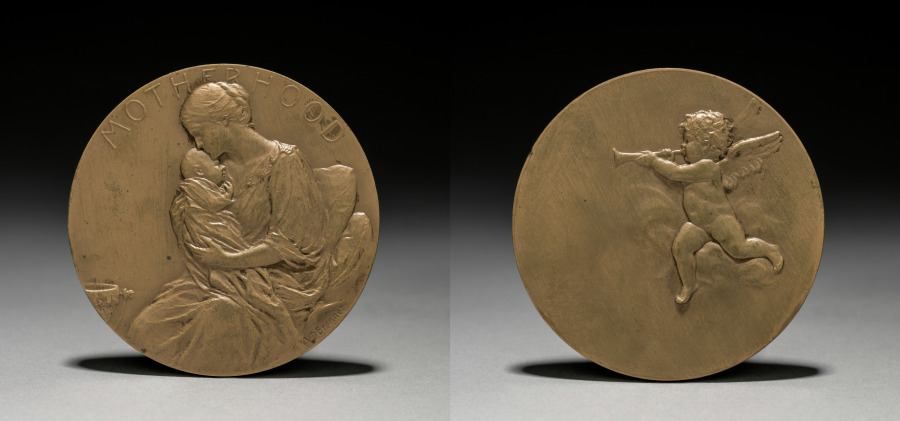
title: Medal: Motherhood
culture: America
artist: Victor D. Brenner (American, 1871–1924)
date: 1911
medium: bronze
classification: Metalwork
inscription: above: "MOTHERHOOD"; lower right: "VD Brenner."